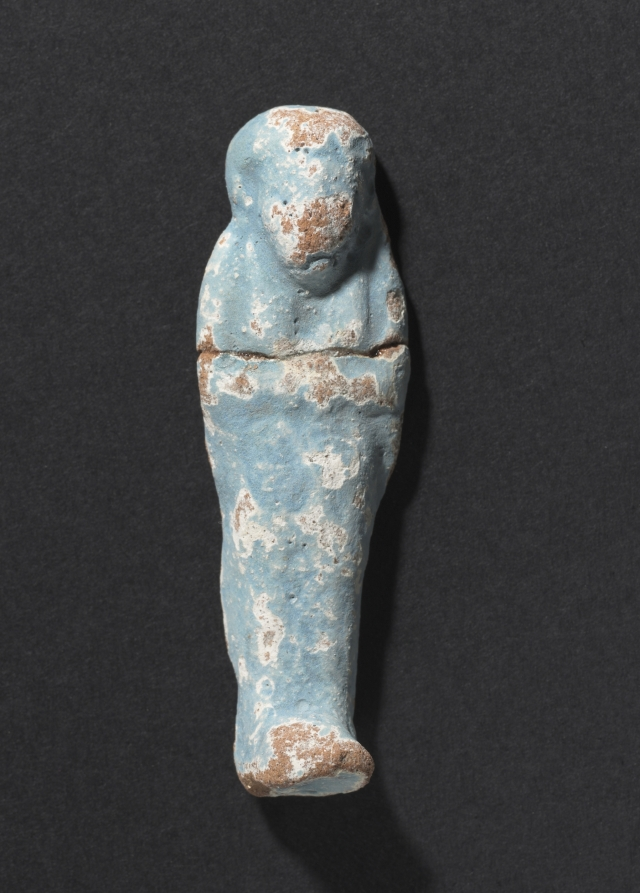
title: Shawabty of Ditamenpaankh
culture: Egypt, Late period (715–332 BCE), Dynasty 25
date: 715–656 BCE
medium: terracotta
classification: Funerary Equipment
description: High demand for shawabtys in the Late Period, a time when as many as 400 or more shawabtys were placed in the tomb with the deceased, gave rise to a specialized container for storing them: the shawabty box. This example is inscribed for the lady of the house, Ditamenpaankh, and was probably one of a pair originally made for her. The single-masted boat on the box's lid is perhaps an allusion to the pilgrimage of the deceased to the holy city of Abydos, the cult city of Osiris, king of the dead. The shawabtys inside are crude, mass-produced examples cast in an open mold. Made of terracotta, their blue paint imitates more costly shawabtys made of faience. As for the shawabty spell, it has been removed from its traditional location on the shawabty's front and relocated onto the sides of box, where it needed only to be written once, thus expediting production.